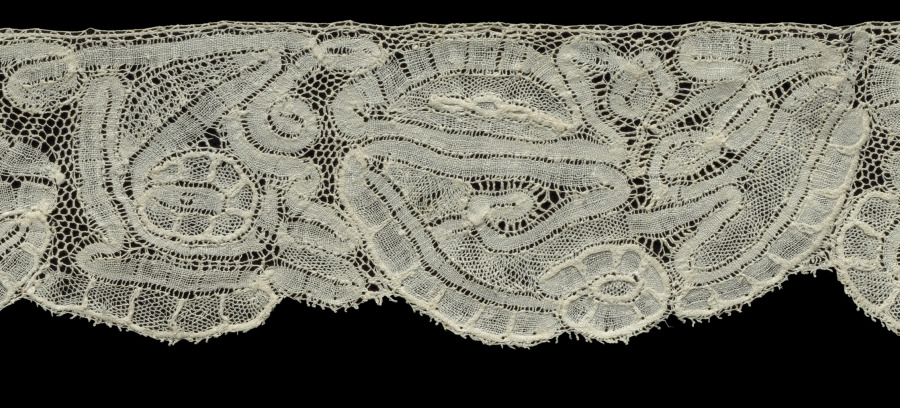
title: Lace Edging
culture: Belgium, Brussels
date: 1700s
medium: Bobbin lace (Point d'Angleterre?)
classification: Lace